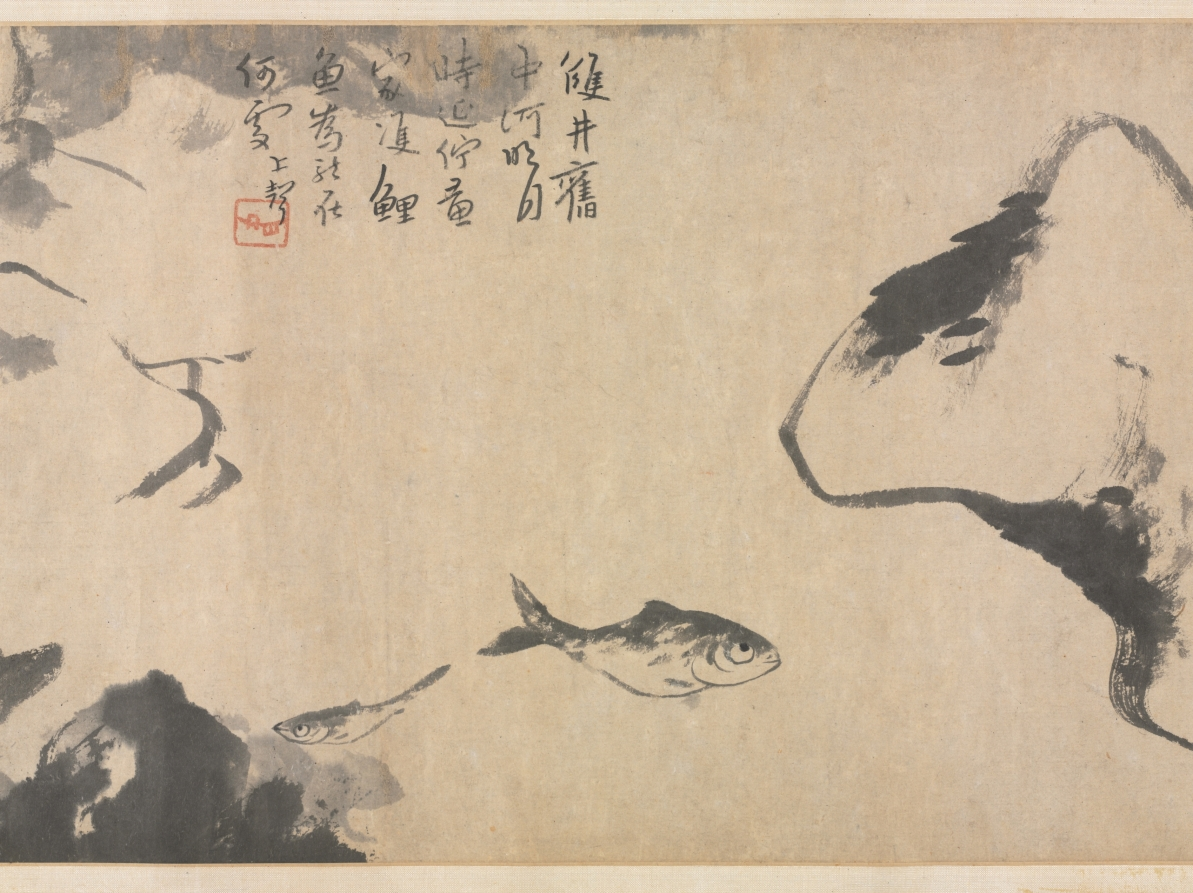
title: Fish and Rocks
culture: China, Qing dynasty (1644-1911)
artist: Bada Shanren (Chinese, 1626–1705)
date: mid- to late 1600s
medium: Handscroll; ink on paper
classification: Painting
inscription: 去天纔尺五，只見白雲行。 云何畫黃花，雲中是金城。 [印] 个山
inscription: 雙井舊中河，明月時延佇。 黃家雙鯉魚，為龍在何處。 [印] 个山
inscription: 三萬六千頃，畢竟有魚行。 到此一黃頰，海潮次上笙。 [印] 个山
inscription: 5 additional seals: 2 of Zhang Daqian 張大千 (1899–1983); 1 of Ta-an Chü-shih; 2 unidentified.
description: Bada Shanren, also called Zhu Da, a 17th-century painter who rejected conventions in favor of an individual, personal expression, is known for his unorthodox compositions of fish, flowers, birds, and rocks. Fish in his paintings are often looking upward toward heaven, swimming in a pond of undefined space. As a member of the Ming imperial family, Zhu Da lost his princely status and hid in a monastery when the Manchus, foreigners from the north, established the Qing dynasty in 1644. This scroll may have some autobiographical meaning, representing fish as leftover subjects (yimin) who lived in a void, having lost their roles in life after the fall of the dynasty.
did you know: After each poem, Bada Shanren used his so-called jixingyin seal 屐形印, which resembles the impression of a shoe on soft mud.